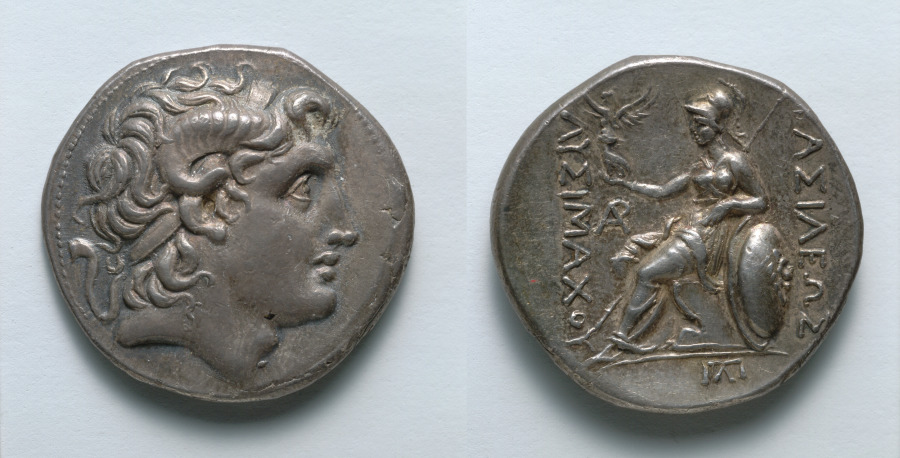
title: Tetradrachm: Head of Alexander (obverse); Athena (reverse)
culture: Greek, Macedonian, minted at Lysimachia (Thrake), reign of Lysimachos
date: 297–281 BCE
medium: silver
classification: Coins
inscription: ΒΑΣΙΛΕΩΣ | ΛΥΣΙΜΑΧΟΥ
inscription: ΑΡ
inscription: Λ within Π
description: A contemporary of Alexander the Great and one of his generals, Lysimachos used coins like this one to emphasize his connections to the fallen leader. The images of the goddesses Athena and Nike, or Victory, on the reverse, together with an inscription naming King Lysimachos, further legitimize his reign, first in Thrace and then in parts of Macedonia and Asia Minor.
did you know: Although Alexander the Great appears on this coin, the inscription on the reverse identifies its issuer as Lysimachos.